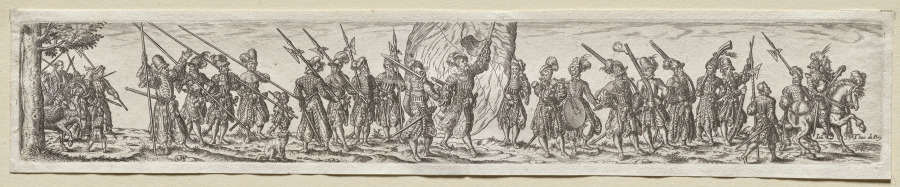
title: Marching Soldiers, in the Center a Standard Bearer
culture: Flanders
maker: Johann Theodor de Bry (German, 1561–1623)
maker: after Jost Amman (Swiss, 1539-1591)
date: 1584–1623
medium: engraving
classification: Print